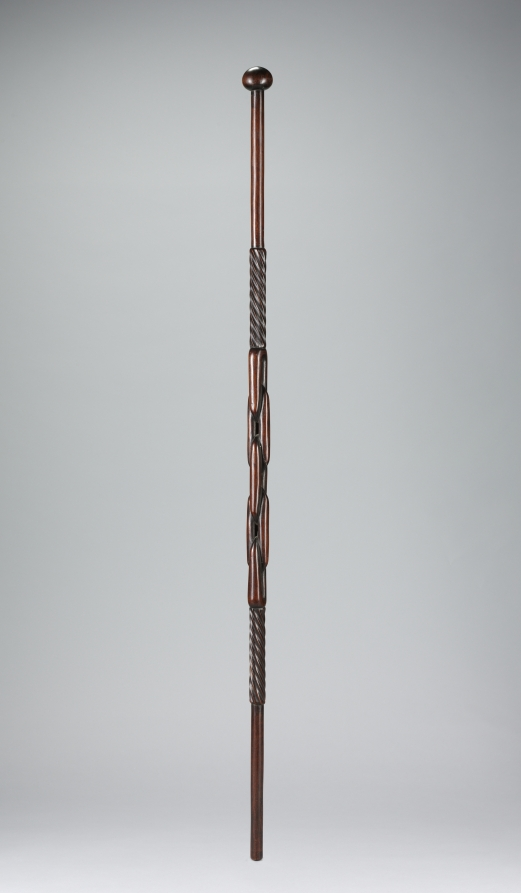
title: Prestige Staff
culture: Africa, Southern Africa, South Africa, Tsonga-style or Zulu-style maker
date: 1800s–1900s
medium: Wood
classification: Implements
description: The primary use of long staffs like this was purely practical; they served as walking companions when their pastoralist-owners covered long distances accompanying their cattle in search of new pastures. The tall height of this staff indicates the elevated status or special function of the man who owned it. Carved from one piece of wood, its spherical knob finial and the geometric designs incorporated into its shaft decoration—consisting of spiraling segments and chain links—demonstrate its maker’s superior skills.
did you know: Tsonga and Zulu staffs all have strong symbolic associations and value. They visually connect the identity of their owners with that of their ancestors and with that of the community to which they belong.